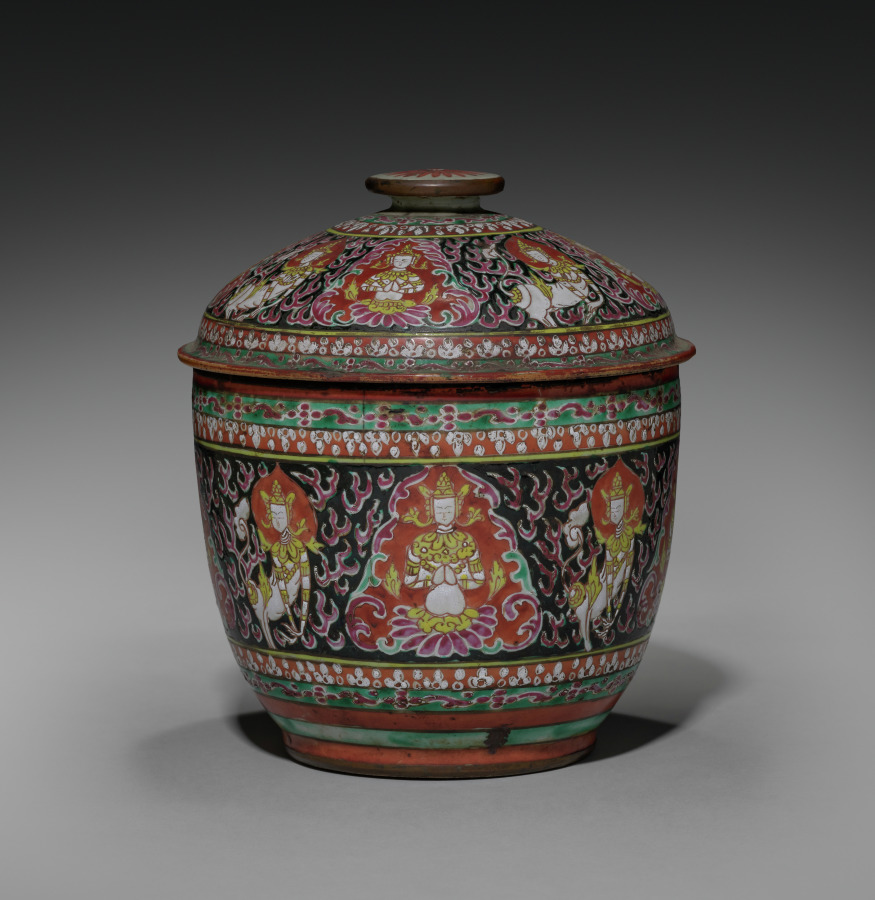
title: Jar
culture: Siam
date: 1800s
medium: porcelain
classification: Ceramic